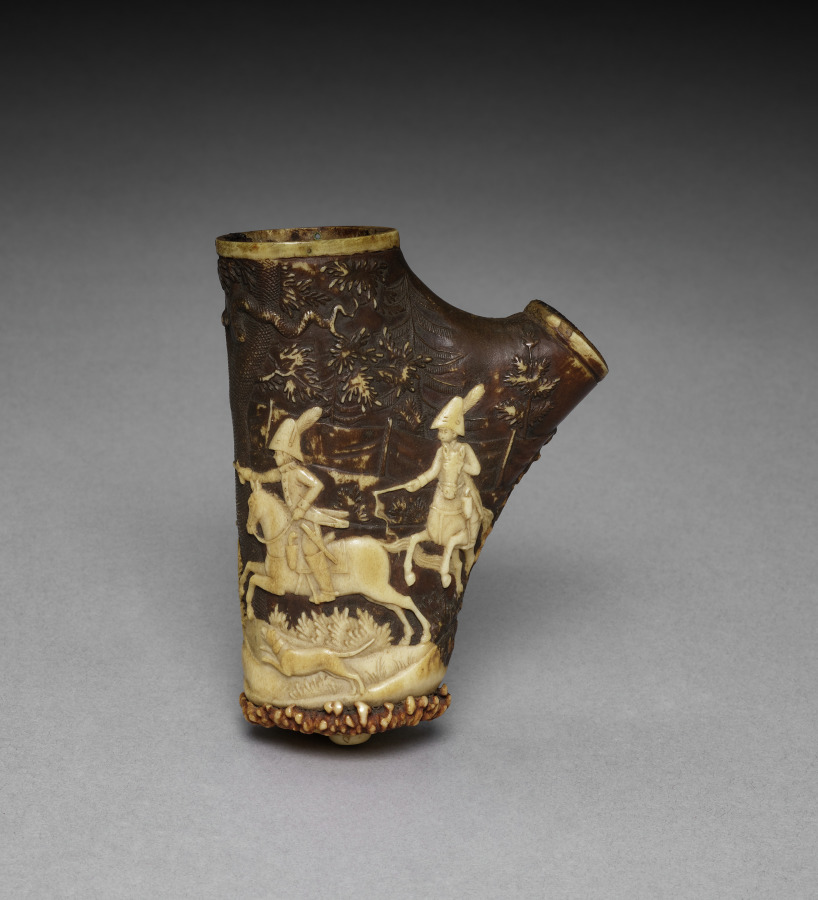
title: Primer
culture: Italy, 18th century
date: 1700s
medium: carved horn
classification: Arms and Armor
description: A priming flask is used to hold and pour fine gun powder into the priming pan of a gun. Scenes of hunting were a favorite decoration on these accessories.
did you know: This hunting accessory was carved out of horn.